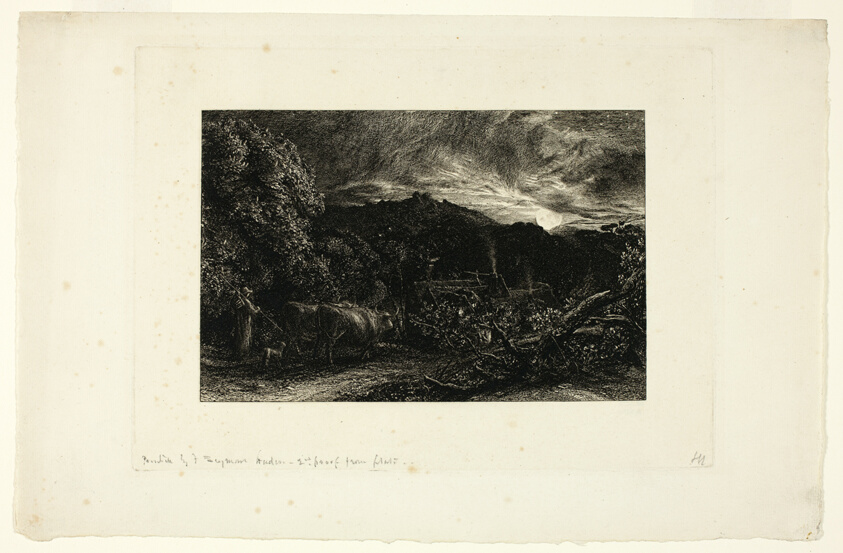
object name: Print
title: The Herdsman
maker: Samuel Palmer (English, 1805-1881)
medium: Etching in black on paper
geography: England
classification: etching; print; prints and drawing